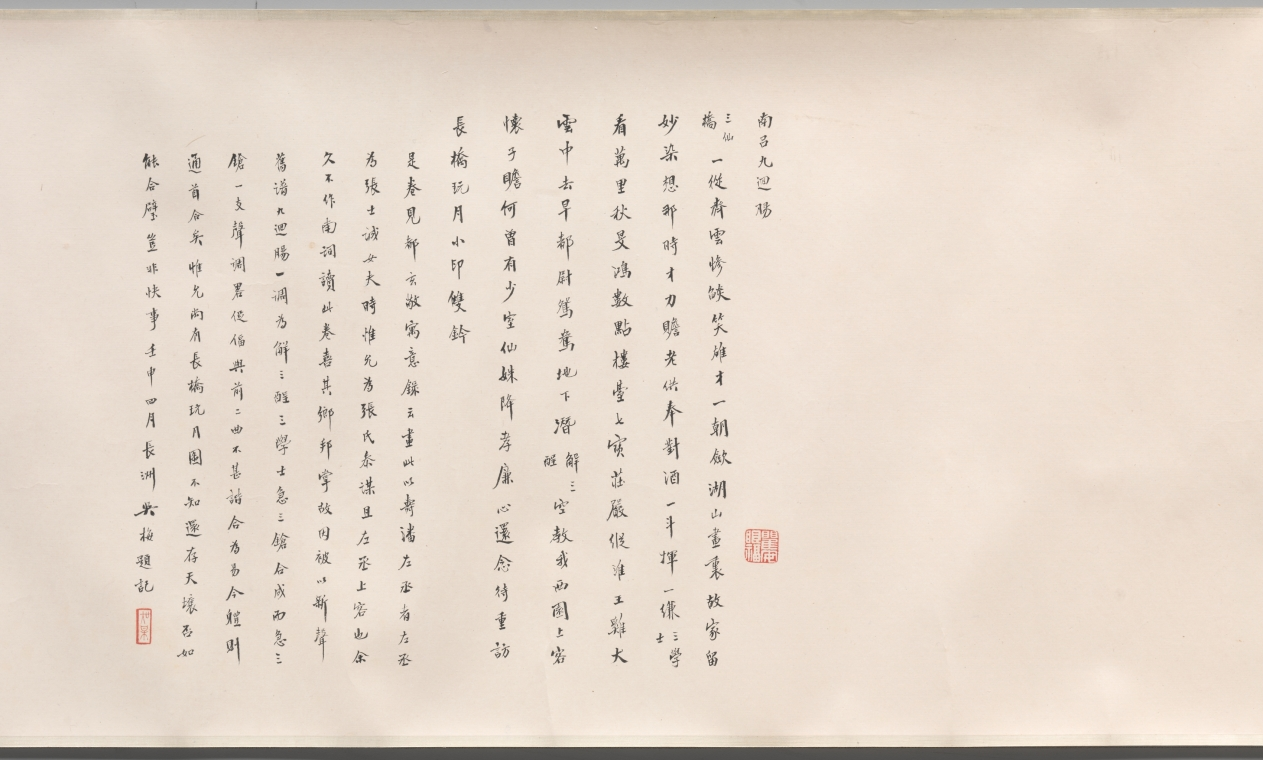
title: Mountains of the Immortals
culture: China, Yuan dynasty (1271-1368)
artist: Chen Ruyan (Chinese, c. 1331–1371)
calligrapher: Ni Zan (Chinese, 1301–1374)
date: 1300–1370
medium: Handscroll; ink and color on silk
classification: Painting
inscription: 1 inscription, 3 colophons, and 37 seals: 1 inscription, dated 1371, by Ni Zan 倪瓚 (1301-1374); 17 seals of Xiang Yuanbian 項元汴 (1525-1590); 4 seals of Chu Chih-ch'ih (late Ming Dynasty); 1 seal of Liang Qingbiao 梁淸標 (1620-1691); 1 seal of Gao Shiqi 高士奇 (1645-1704); 4 seals of Lu Xinyuan 陸心源 (1834-1894); 1 colophon, dated 1908, and 5 seals of Jing Xian 景贒; 1 colophon, dated 1915, by Lung Yu; 1 colophon, dated 1932, and 2 seals of Wu Mei; 3 seals unidentified.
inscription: 仙山圖， 陳君惟允所畫。 秀潤清遠， 深得趙榮祿筆意。 其人已矣， 今不可復得。 辛亥十二月二日倪瓚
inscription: Colophon by Jing Xian 景贒: The preceding Land of Immortals is an authentic work of the Yuan master, Chen Weiyun 陳惟允. According to the Yu yi bian 寓意編 by Du Mu 都穆of the Ming Dynasty, the painting was seen at the home of Chen Mengxian 陳孟賢 [c. 1500], a hermit. It is also recorded in Yu yi lu 寓意錄 of the present [Qing] era. The dimensions and the seals are all correct. When the painting went into the possession of Liang Qingbiao 梁淸標, the silk was already quite dilapidated. The only thing now missing, however, is the one line of writing by Xiang Zijing 項子京 [Xiang Yuanbian 項元汴] who records the original price he paid, being fifteen taels of silver. This must have been cut off by the dealer, which nevertheless did no harm to a masterpiece such as this. Jing Xian recorded this in the second month of the maoshen year [1908].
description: The landscape in deep green tones offers a view into a secluded mountain valley, populated by ancient figures surrounded by deer and cranes, all under high pine trees. A red-robed immortal in the air steers his crane toward the paradise land. This idyllic scene was presumably created amid the tumultuous transition from the Yuan to the Ming dynasty. Chen from Suzhou supported major rebel leaders, first Zhang Shicheng (1321–1367) with his base in Suzhou and then his rival Zhu Yuanzhang in Nanjing, after the latter had established the Ming dynasty. Chen was executed in 1371.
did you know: Such blue and green landscapes often evoke nostalgia for the idealized ancient times.